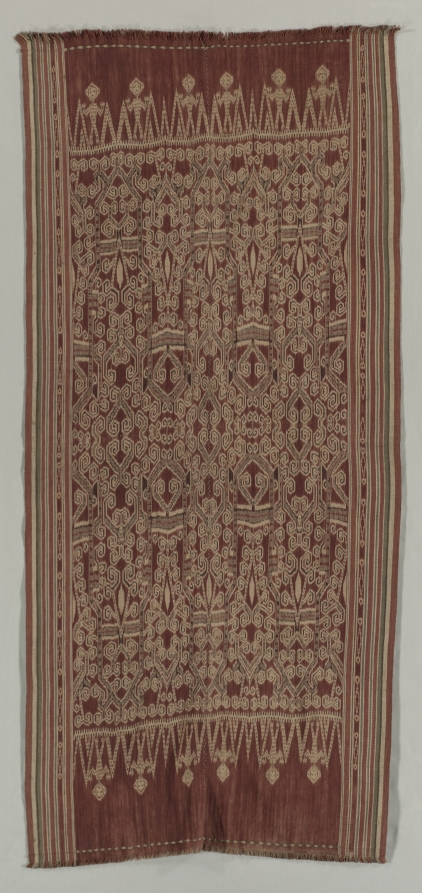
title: Pua (Ceremonial Blanket)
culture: Indonesia, Borneo, Sarawak Region, Iban Dyak tribe, late 19th-early 20th century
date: late 1800s-early 1900s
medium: plain weave cotton; ikat dyed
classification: Textile